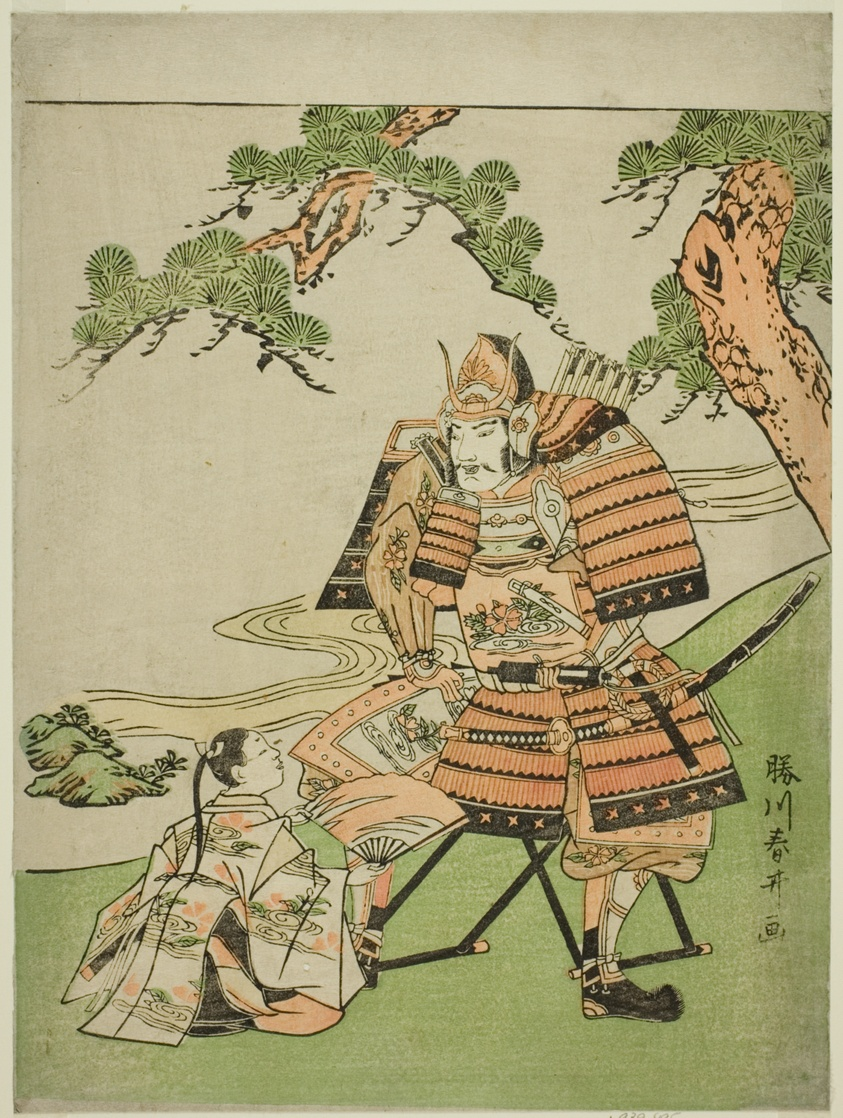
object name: Print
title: The Warrior Kusunoki Masashige (1294-1336) Bidding Farewell to His Son Masatsura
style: Japanese (culture or style)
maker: Katsukawa Shunsei (Japanese, active late 1780s-early 1790s)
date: 1780s (?)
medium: Color woodblock print; chuban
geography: Japan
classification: woodblock print; print; asian art